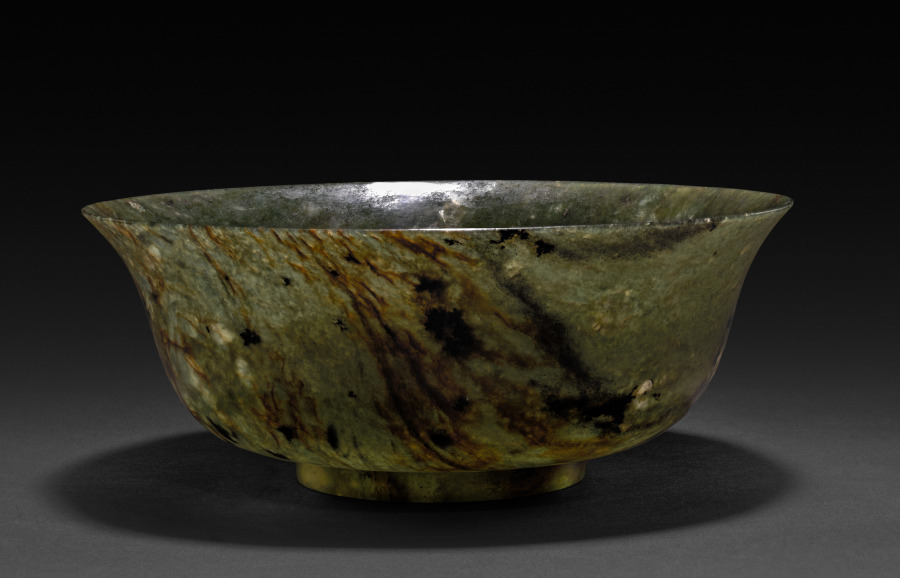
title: Bowl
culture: China, Qing dynasty (1644–1911), Qianlong reign (1736–95)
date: 1736–95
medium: spinach jade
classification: Jade